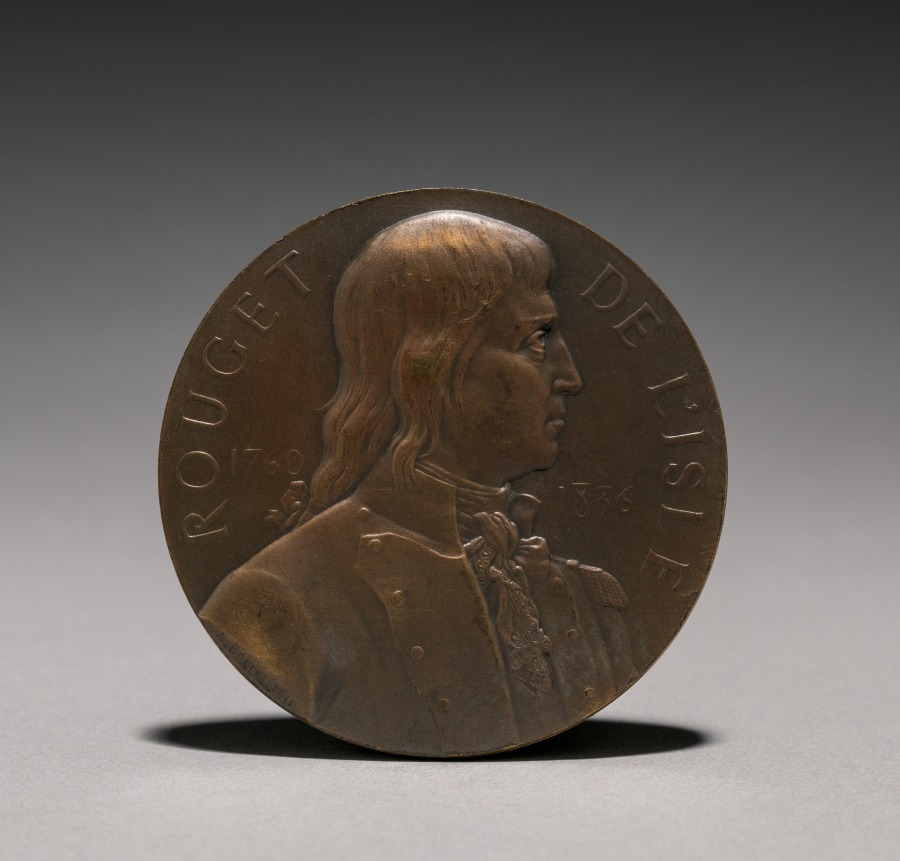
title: Medal of Claude Joseph Rouget de L'Isle (1760-1836)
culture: France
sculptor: Alfred Borrel (French, 1836–1927)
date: 1911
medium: bronze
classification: Metalwork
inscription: Obverse: raised inscription: ROUGET DE L'ISLE 1760 1836; inscribed lower left: A. BORREL Reverse: [score and all verses of "La Marseillaises"]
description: The French sculptor and medalist Alfred Borrel (1836-1927) created this portrait medal to commemorate the 75th anniversary of Rouget de L'Isle's death in 1836, the same year in which the sculptor was born.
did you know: Claude Joseph Rouget de L'Isle composed the French national anthem, La Marseillaises, in 1792 in Strasbourg after France had declared war on Austria.